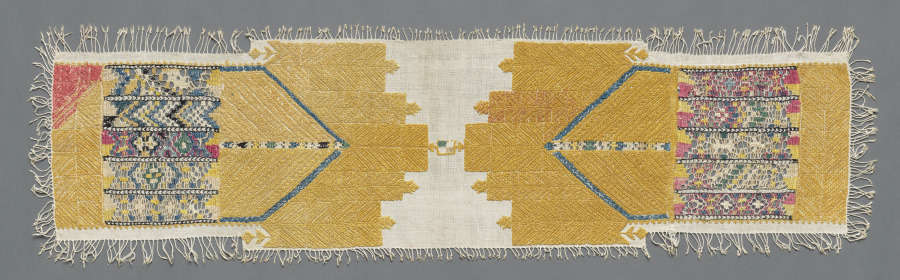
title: Furnishing textile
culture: Africa, North Africa, Morocco, Chefchaouen, Moroccan embroiderer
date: 1800s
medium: Linen, silk, dye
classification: Embroidery